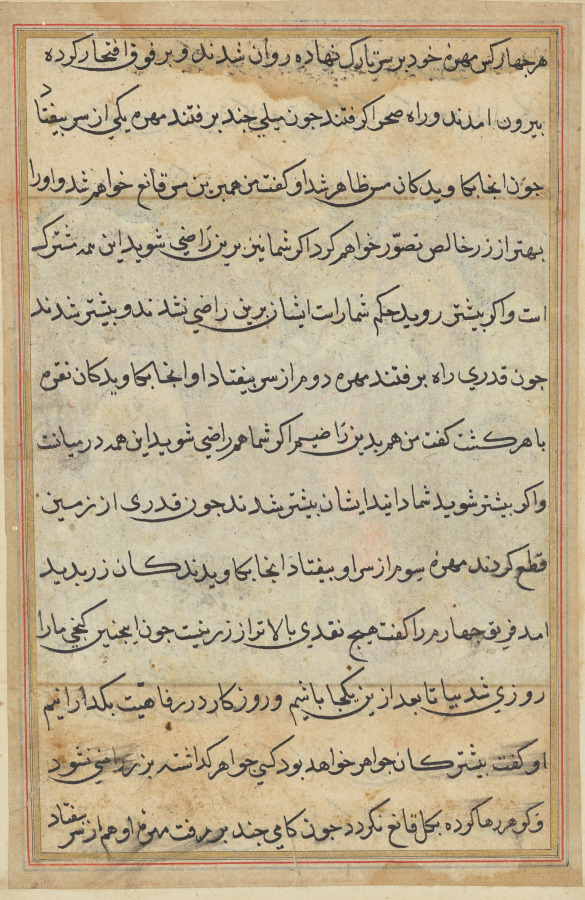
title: Page from Tales of a Parrot (Tuti-nama): text page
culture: Mughal India, court of Akbar (reigned 1556–1605)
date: c. 1560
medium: gum tempera, ink, and gold on paper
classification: Painting